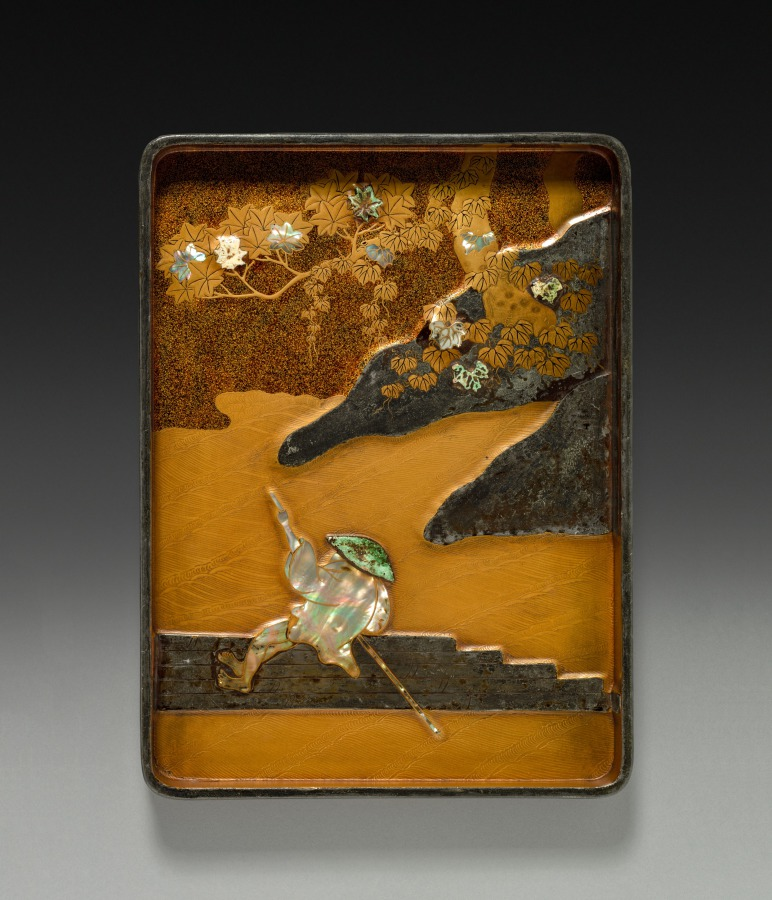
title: Inkstone Case (lid)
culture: Japan, Edo period (1615–1868)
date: 1800s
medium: lacquer on wood inlaid with mother-of-pearl, applied carved metal, and glazed ceramic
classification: Lacquer